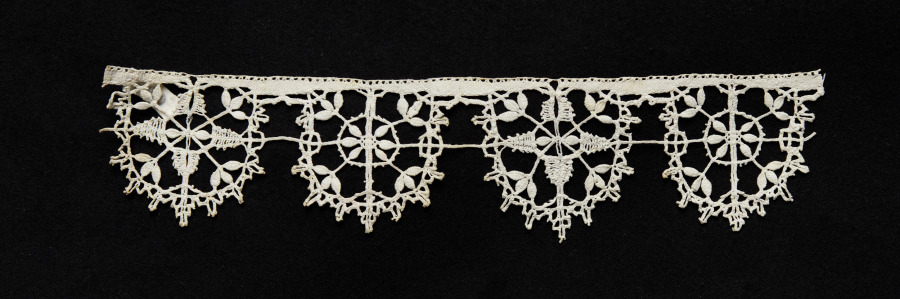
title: Lace Edging of Points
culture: Italy, Genoa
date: 1550–99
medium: Bobbin lace (needle lace, reticella design)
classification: Lace